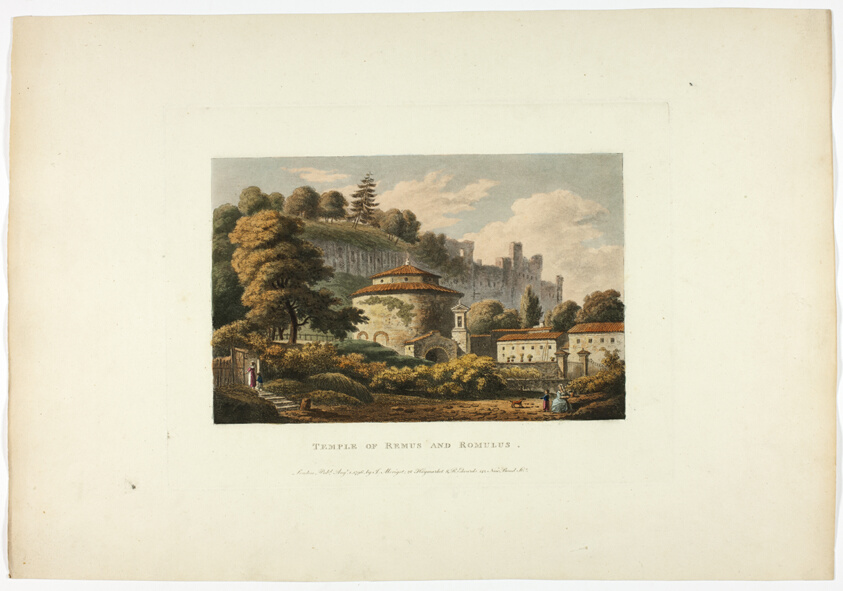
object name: Print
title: Temple of Remus and Romulus, plate sixteen from the Ruins of Rome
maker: M. Dubourg, (English, active 1786-1838); published by J. Merigot (Italian, Unknown)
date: published August 4, 1796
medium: Hand-colored aquatint on paper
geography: England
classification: aquatint; print; prints and drawing